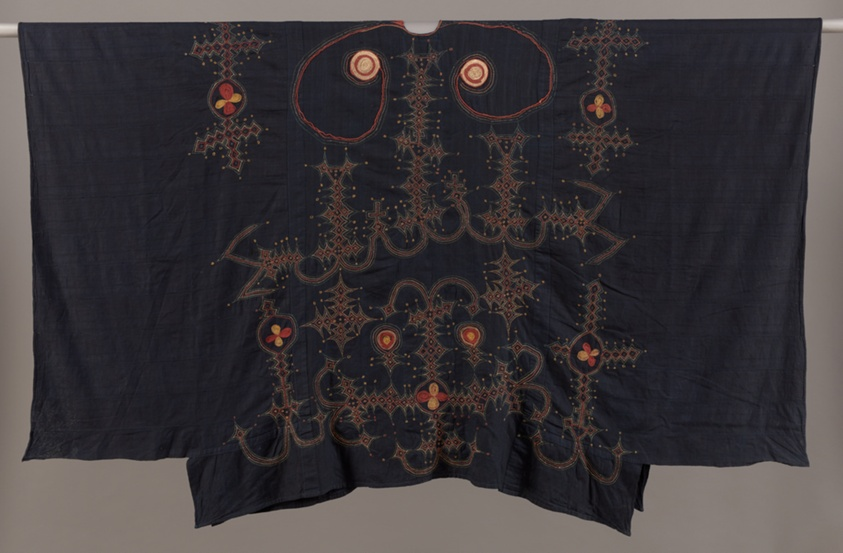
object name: Textile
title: Robe (Boubou Lomasa)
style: soninke, Arts of Africa, african, Islamic, african Art, Northern Africa and the Sahel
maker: Soninke; Possibly Senegal or Mali; Northern Africa and the Sahel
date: Late 19th century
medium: Handspun cotton, indigo dye; polychrome silk and cotton; strip weave, hand embroidery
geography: Senegal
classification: garment; arts of Africa; textile; regalia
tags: robes, islamic, authority, status, garment